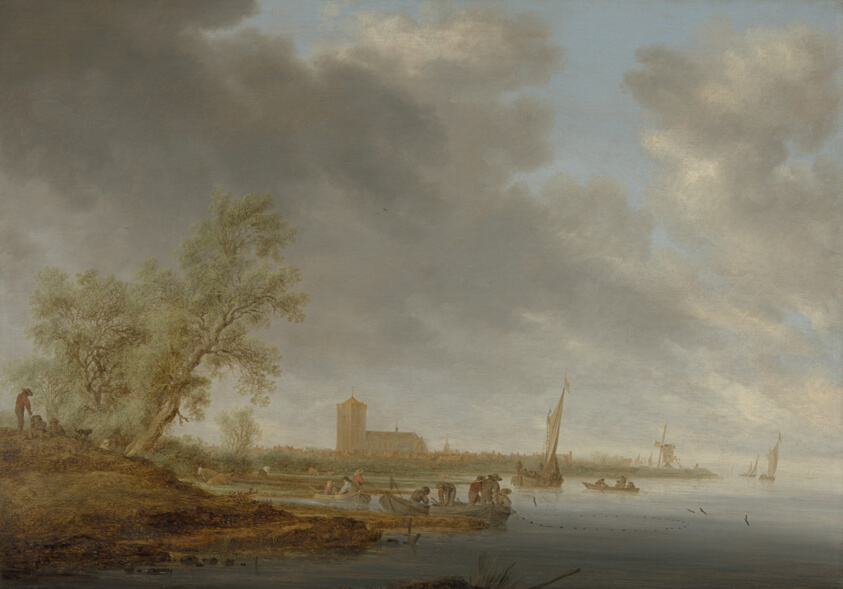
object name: Painting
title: River Landscape with a View of Naarden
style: 17th Century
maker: Salomon van Ruysdael (Dutch, about 1602–1670)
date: 1642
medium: Oil on panel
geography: Netherlands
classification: painting; paint; oil paintings (visual works); oil on panel; dutch; european painting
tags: landscapes, work, water, trees, sky, sailing, rivers, river, net, men, landscape, labor, fisherman, clouds, church, bushes, building, boats, boatman, birds, bird